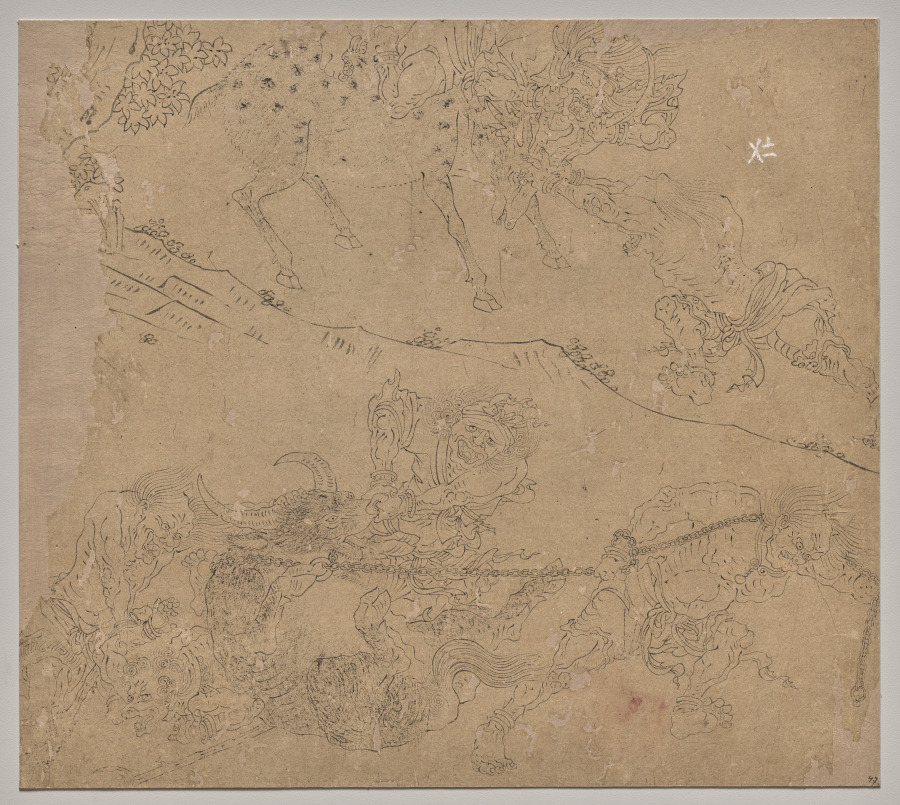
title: Album of Daoist and Buddhist Themes: Search the Mountain: Leaf 47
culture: China, Southern Song dynasty (1127-1279)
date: 1200s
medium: Album, ink on paper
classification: Painting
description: This extraordinary album has 50 paintings on a variety of religious subjects. They were likely created by several master craftsmen to share with studio apprentices as models for fulfilling commissions. The Jade Emperor and the Daoist pantheon make up the first 26 leaves. The next 14 leaves portray the Buddhist Ten Kings of Hell administering punishments to the dead. The third section, called “Clearing the Mountains,” features divine soldiers, led presumably by the deity Erlang Shen 二郎神, fighting undesirable creatures.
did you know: Three demon-soldiers drag an ox on its back with a chain. Above, others take a deer by its antlers.